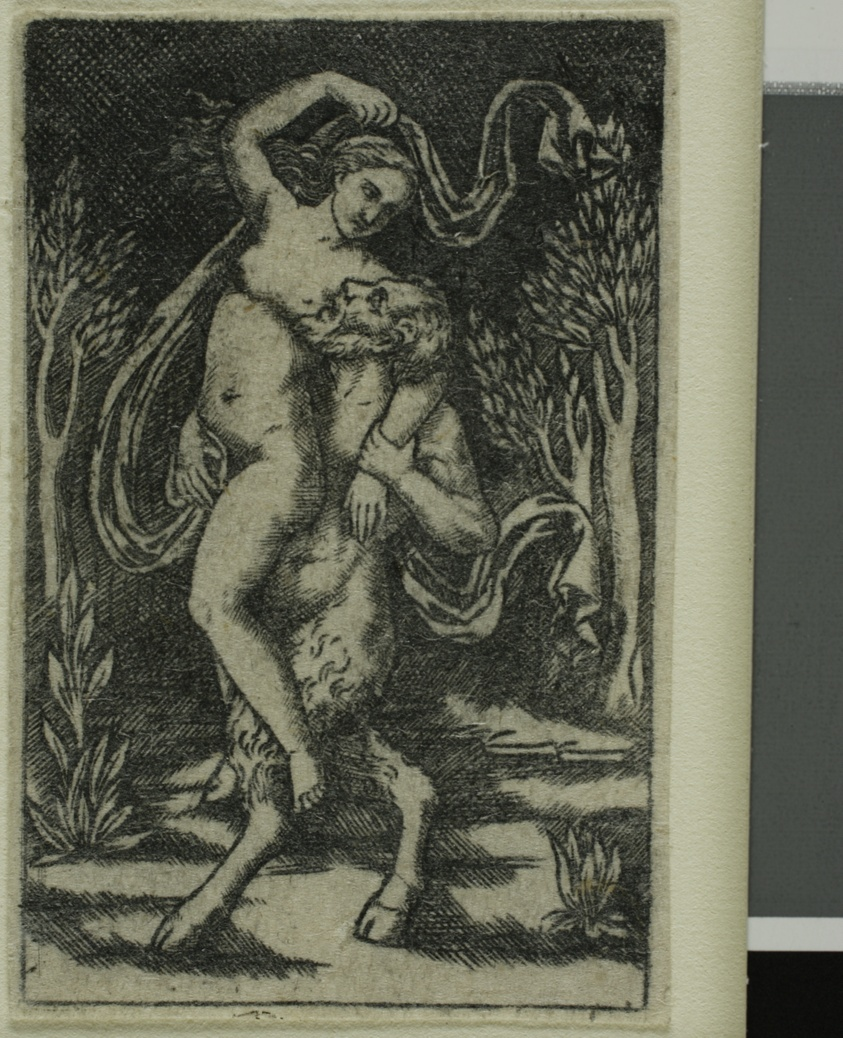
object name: Print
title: Satyr Carrying a Nymph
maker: Unknown Artist; Italian, 15th or 16th century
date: 1490/1500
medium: Engraving on paper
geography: Italy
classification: engraving; print; prints and drawing